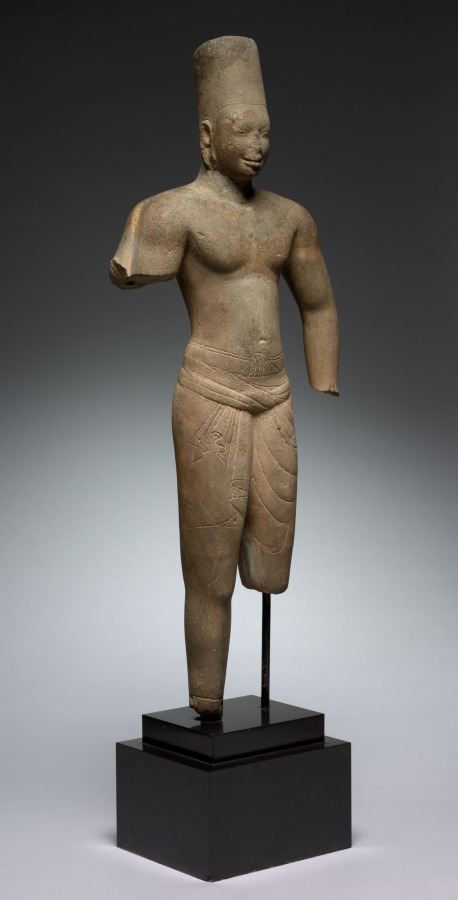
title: Vishnu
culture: Cambodia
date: 650–99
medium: gray sandstone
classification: Sculpture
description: The muscular physique, sensitive smile, and flat-topped high crown are characteristics of Vishnu images made during the pre-Angkorian period (c. 550–802) in Cambodia. This sculpture probably was the sole object of worship in a small brick temple sanctum.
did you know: The god wears a short garment (sampot) tied to form a loop on the left with the hanging ends on the right thigh.